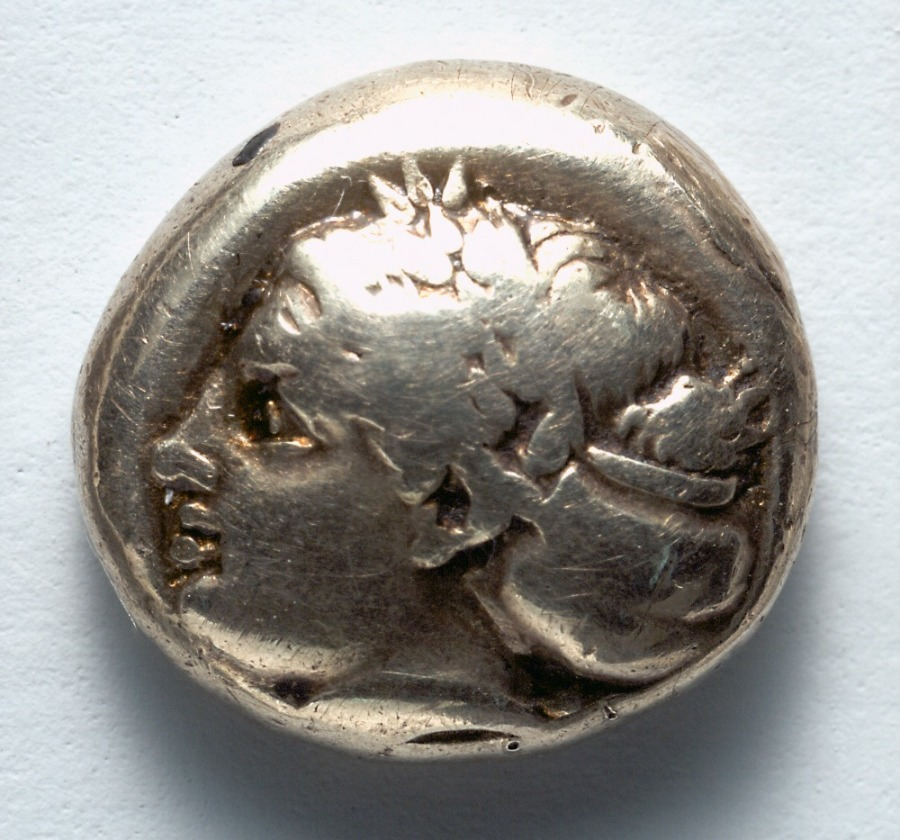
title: Hecte: Female Head (obverse); Incuse Square (reverse)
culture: Greek, minted at Phokaia (Ionia)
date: 600–350 BCE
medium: electrum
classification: Coins